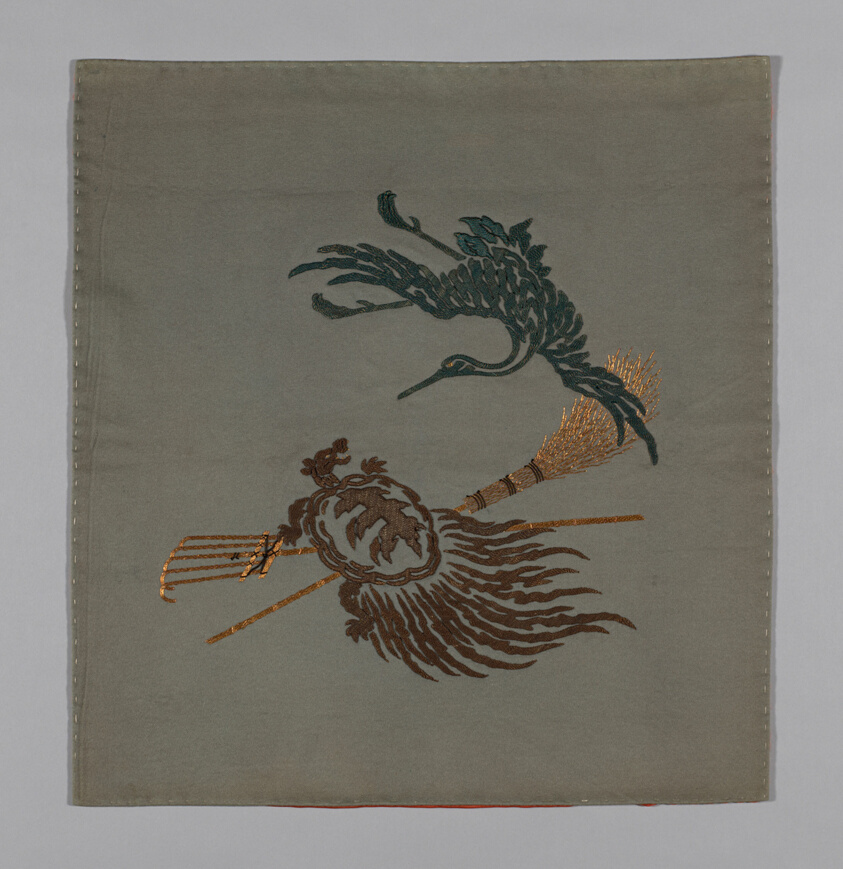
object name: Textile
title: Fukusa (Gift Cover)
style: late edo, edo (japanese period), Japanism, East Asian, asian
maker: Japan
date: late Edo period (1789–1868), early 19th century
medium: Pattered Side: wool, plain weave; fulled (gorofukuren); embroidered with silk and gold- and silver-leaf-over-lacquered-paper- strip wrapped cotton in cross, and single satin stitches; laidwork and paper padded couching; lined with silk, palin weave (possibly dyed with safflower (beni)); sewn with front and lining matched in size (Tackikiri awase); silk, running "controlling" stitches along all edges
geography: Japan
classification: textile; needlework (visual works); weaving